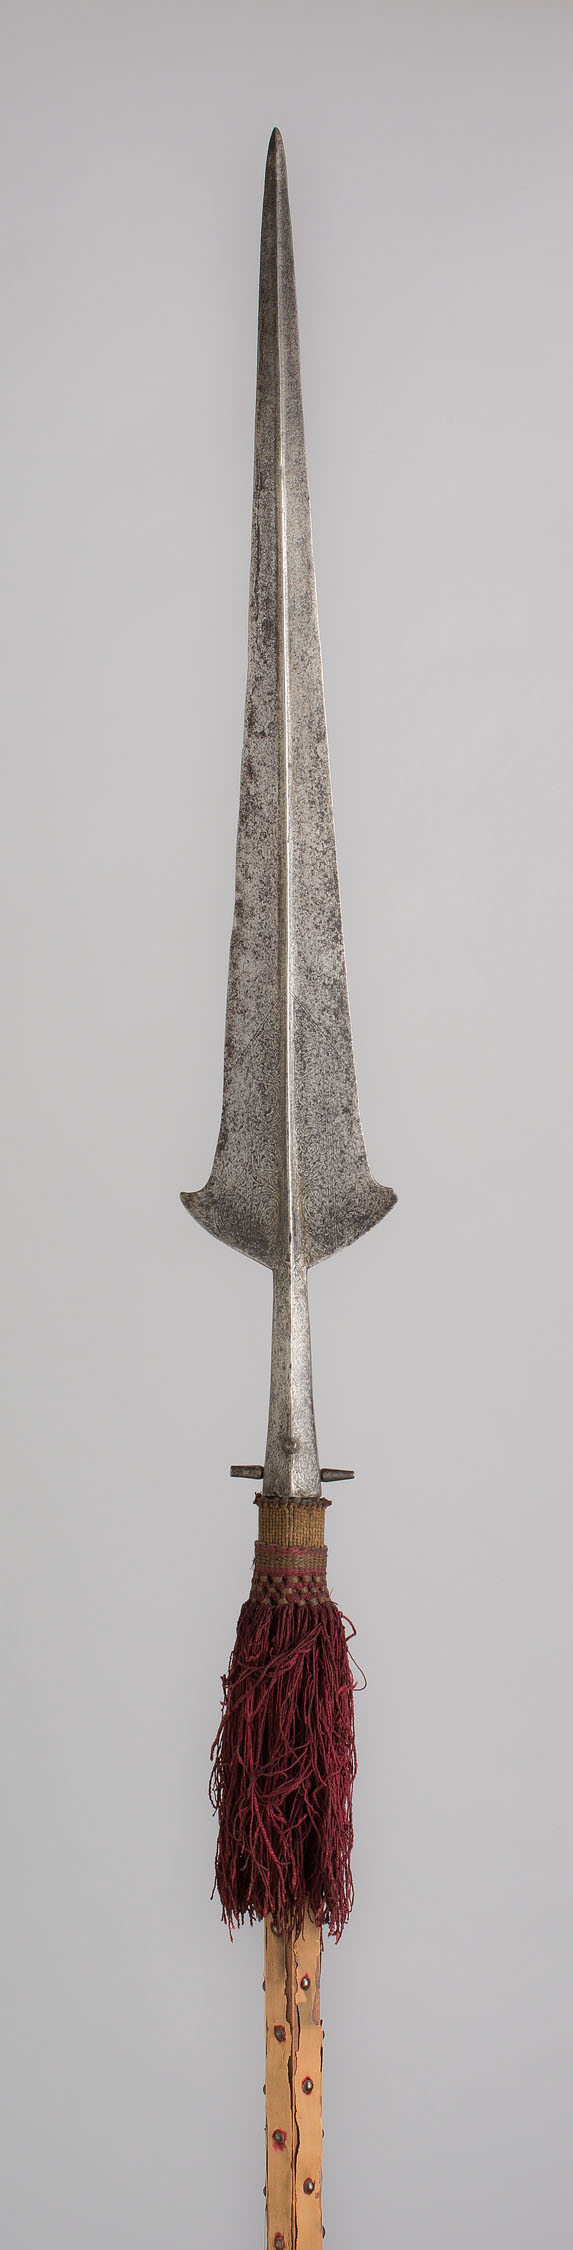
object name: Arms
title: Partisan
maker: Italian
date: c. 1520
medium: Steel, wood (pine), iron, velvet, and tassel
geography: Italy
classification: edged weapon-staff; arms; arms and armor